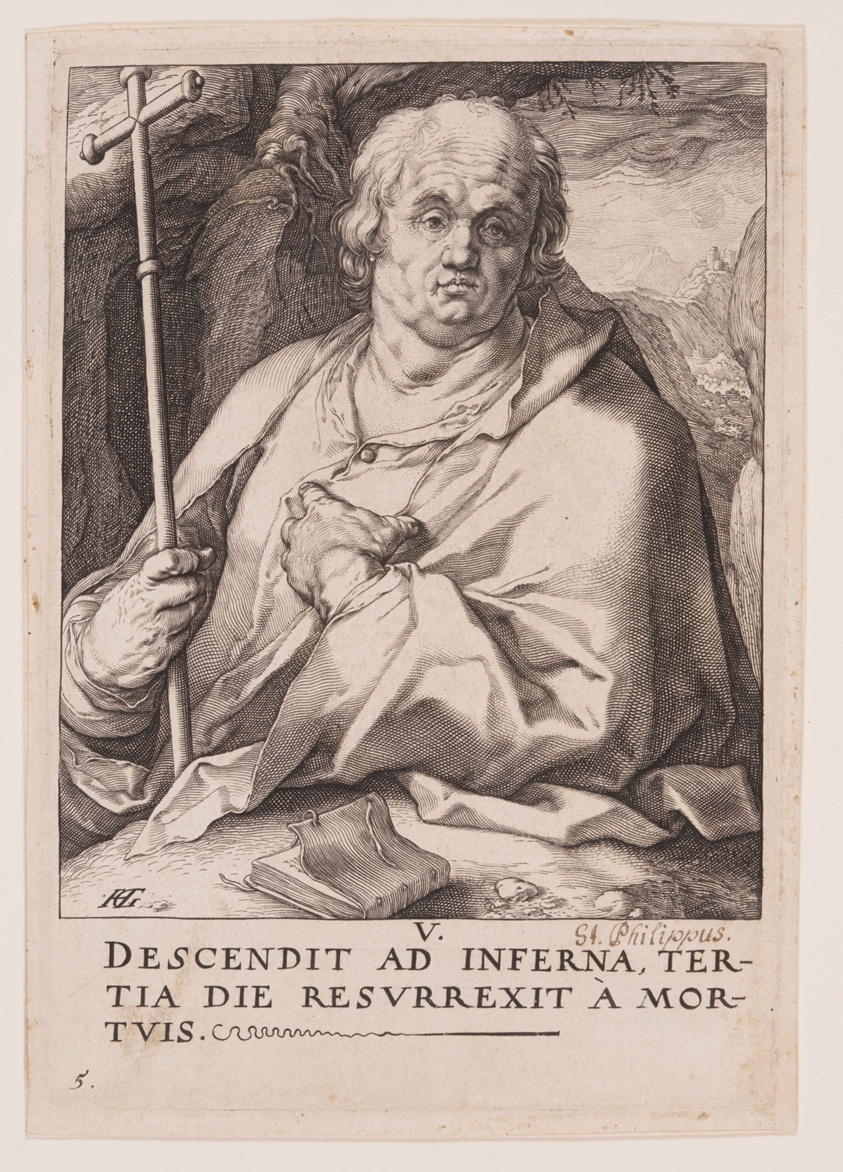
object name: Print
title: St Philip, from Christ, the Apostles and St Paul with the Creed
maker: Hendrick Goltzius (Dutch, 1558–1617)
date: 1589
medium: Engraving on ivory laid paper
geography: Netherlands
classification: engraving; paper; print; prints and drawing